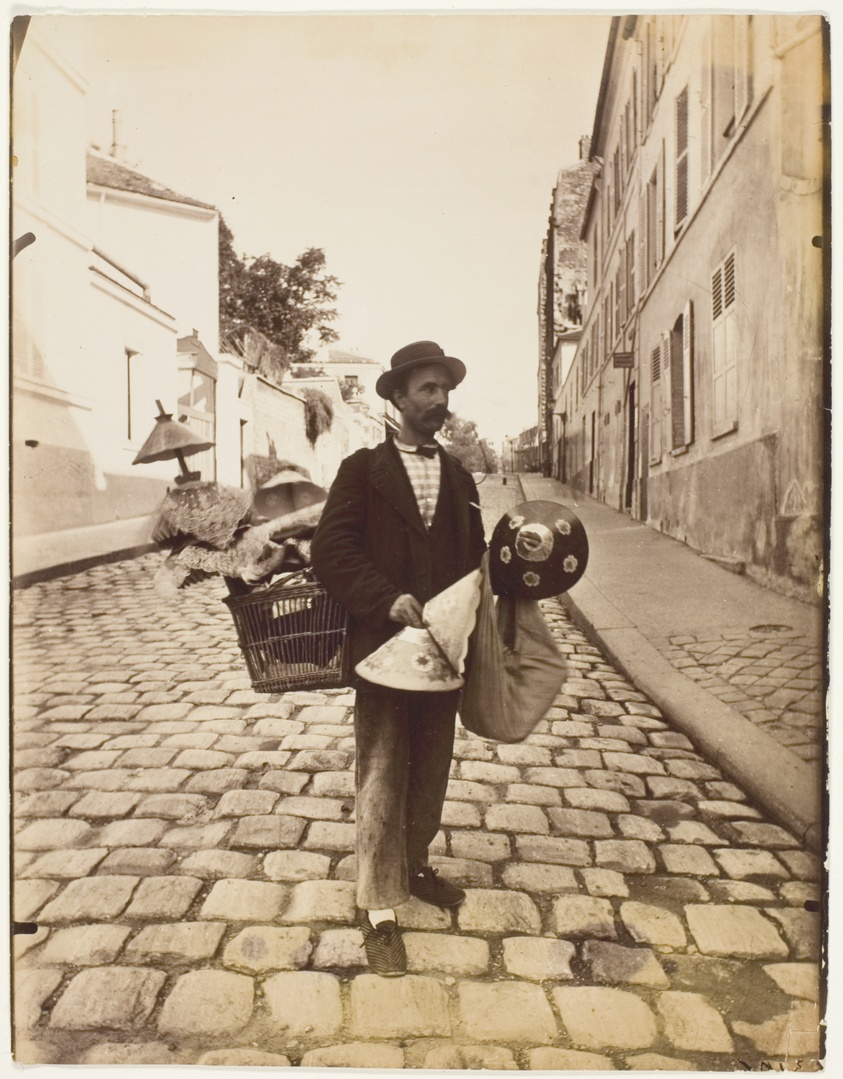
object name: Photograph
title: Marchand abat-jours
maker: Jean-Eugène-Auguste Atget (French, 1857–1927)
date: 1899/1900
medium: Albumen print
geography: France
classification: albumen silver print; photographic process; photography; photograph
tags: cityscapes